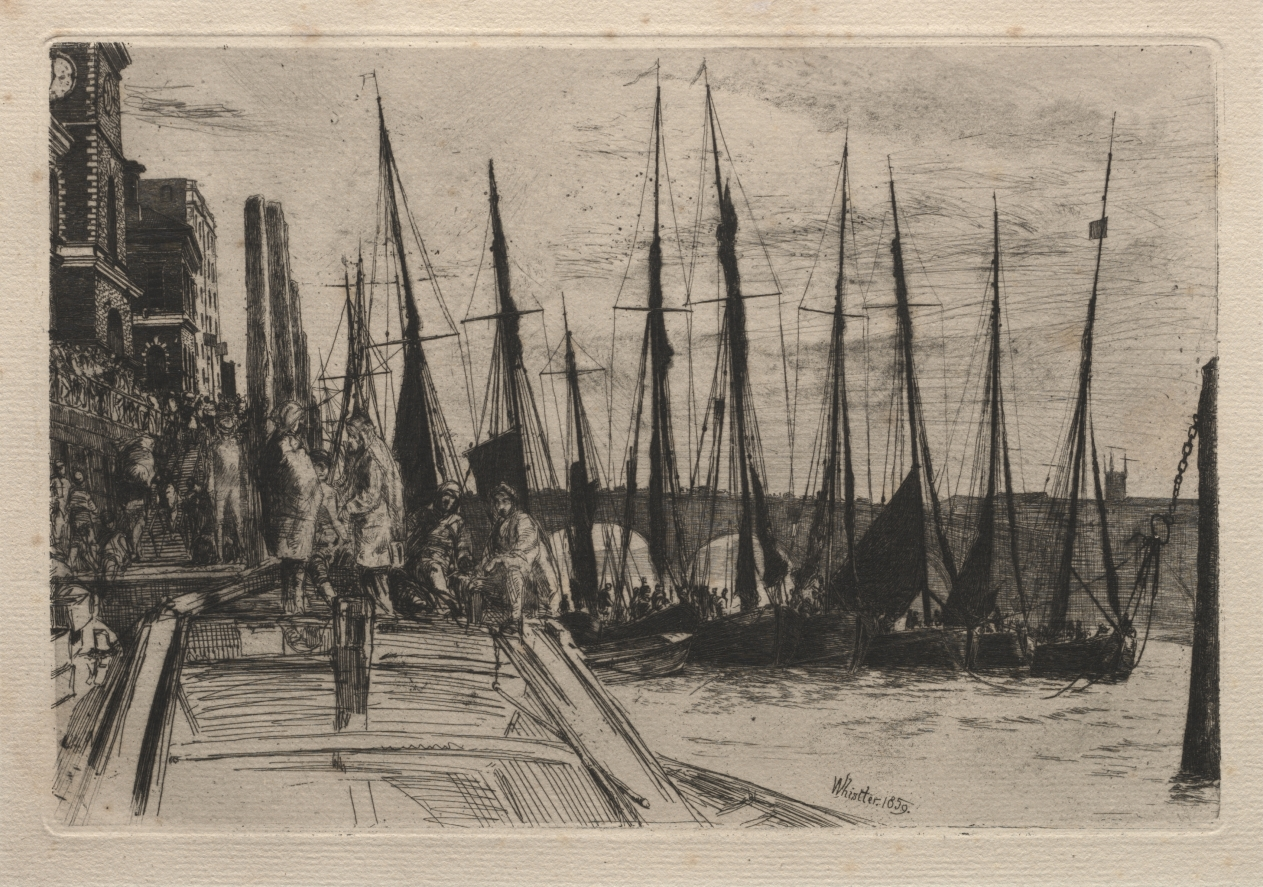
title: Billingsgate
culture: America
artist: James McNeill Whistler (American, 1834–1903)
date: 1859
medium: etching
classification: Print